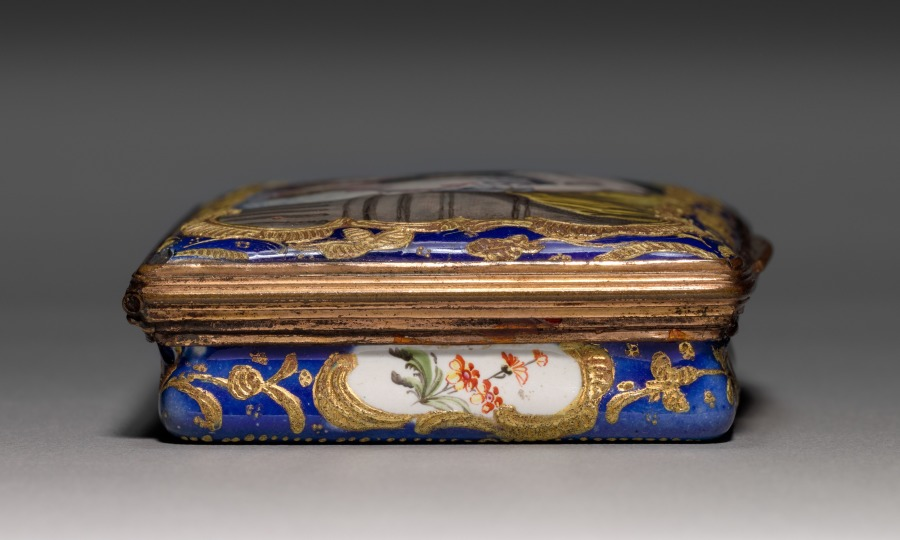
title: Snuff Box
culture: England, South Staffordshire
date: c. 1770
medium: enamel on copper, gilt metal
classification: Miscellaneous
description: Luxurious personal objects, like this snuff box, were an essential part of a privileged wardrobe during the 1700s and early 1800s, emphasizing their owner’s refinement and wealth. Their glittering surfaces, however, disguised a system based on the labor and suffering of enslaved or indentured people, whether in gold or stone mines, tobacco farms, or shops where these goods were made. Like cotton, sugar, and tea, snuff came from British colonies in America, India, and the Caribbean, where enslaved people were exploited to grow these crops under extremely harsh conditions. Slavery was not abolished in much of the British Empire until 1833. Britain and other European nations continued to pursue colonialism with a sense of superiority that found its way into all aspects of life, including decorative objects glorifying their conquests.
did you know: This small, elaborate box held snuff, a form of powdered tobacco that was inhaled in tiny amounts.